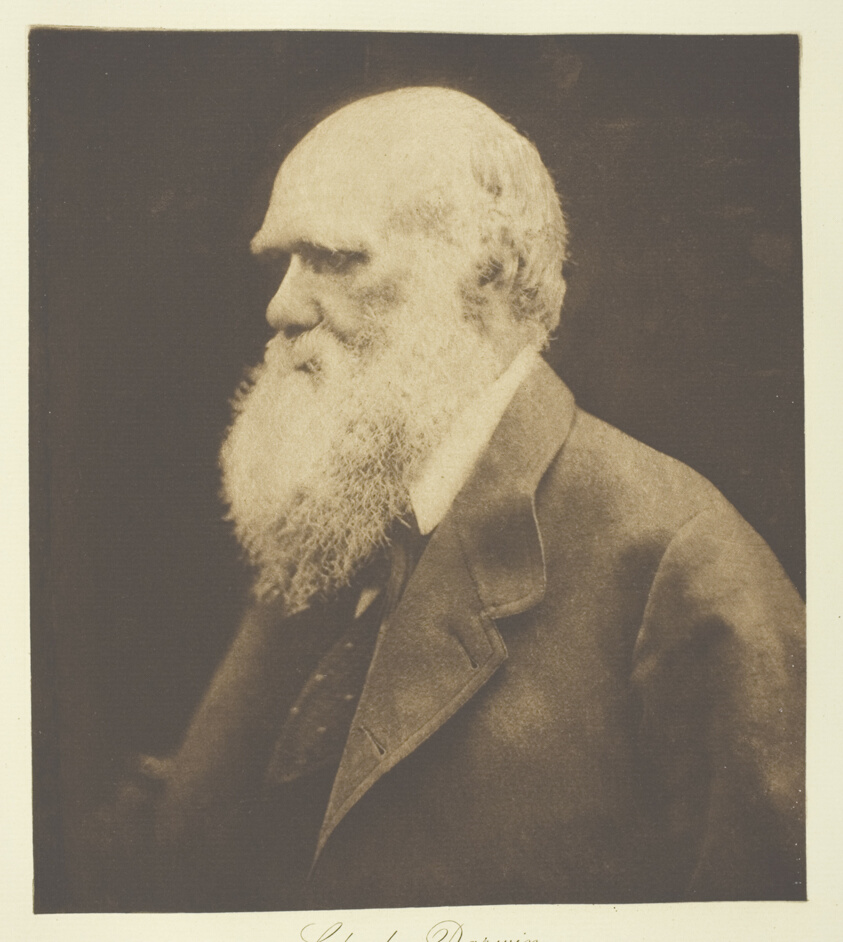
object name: Photograph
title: Charles Darwin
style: 19th century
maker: Julia Margaret Cameron (English, 1815–1879)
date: 1868, printed c. 1893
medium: Photogravure, plate 17 from the album "Lord Tennyson and his Friends" (1893)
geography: England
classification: photogravure; photomechanical process; photography; photograph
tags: Collected by Hugh Edwards, Lord Tennyson and His Friends